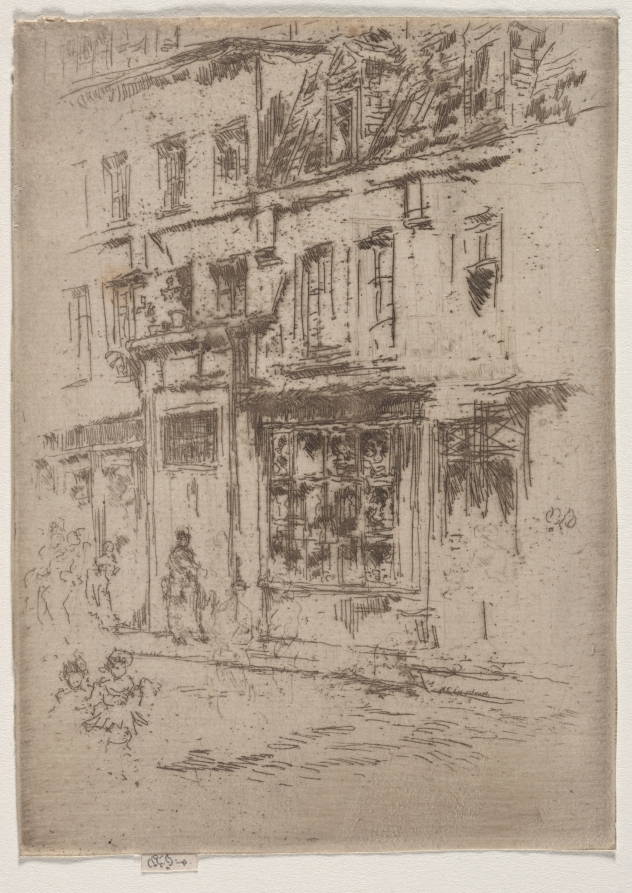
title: Petite Rue au Beurre, Brussels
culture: America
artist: James McNeill Whistler (American, 1834–1903)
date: 1887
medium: etching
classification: Print